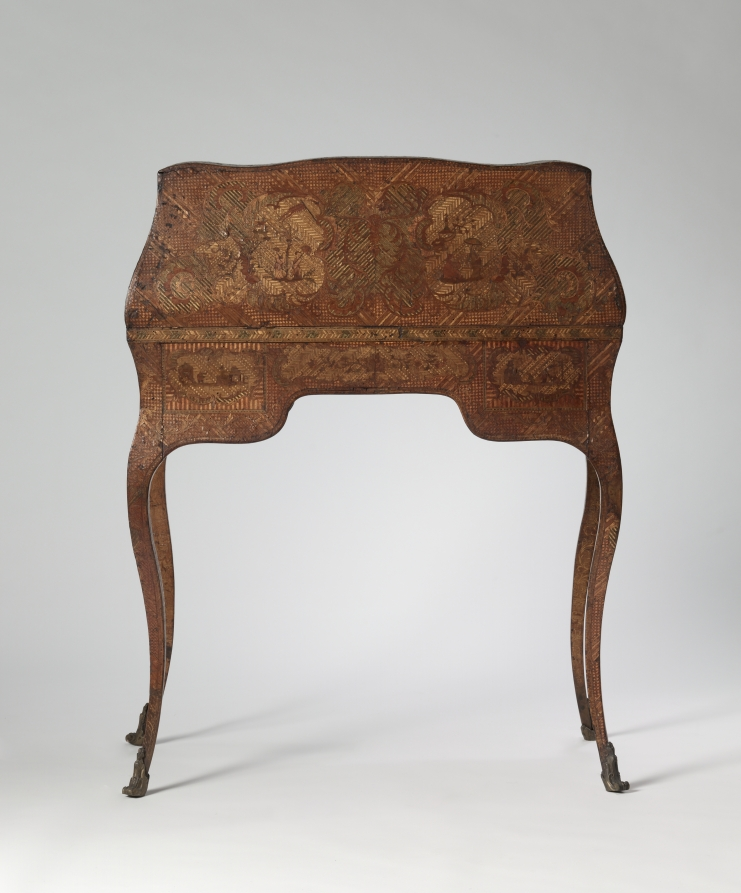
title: Ladies Writing Desk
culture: Possibly Northern Italy, near France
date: c. 1750–75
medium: Oak with straw marquetry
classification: Furniture and woodwork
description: As early as the beginning of the 17th century, straw marquetry was being produced throughout Europe. Along with cabinetmakers and specialized artisans, creators of straw marquetry included home artisans, nuns, monks, and noble dilettantes. Thus the quality and design of objects using straw marquetry is quite diverse. While some pieces appear nearly naive, others are made very masterfully, such as with this ladies writing desk. Some of these objects were even presented in royal cabinets of wonder. Because of its silky gloss and bright colors, straw marquetry was held in great esteem as unusual and remarkable decoration for furniture and other objects on par with gemstones, tortoiseshell, or ivory.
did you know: The surface of this ladies writing desk is completely covered with straw marquetry decoration both outside and in.